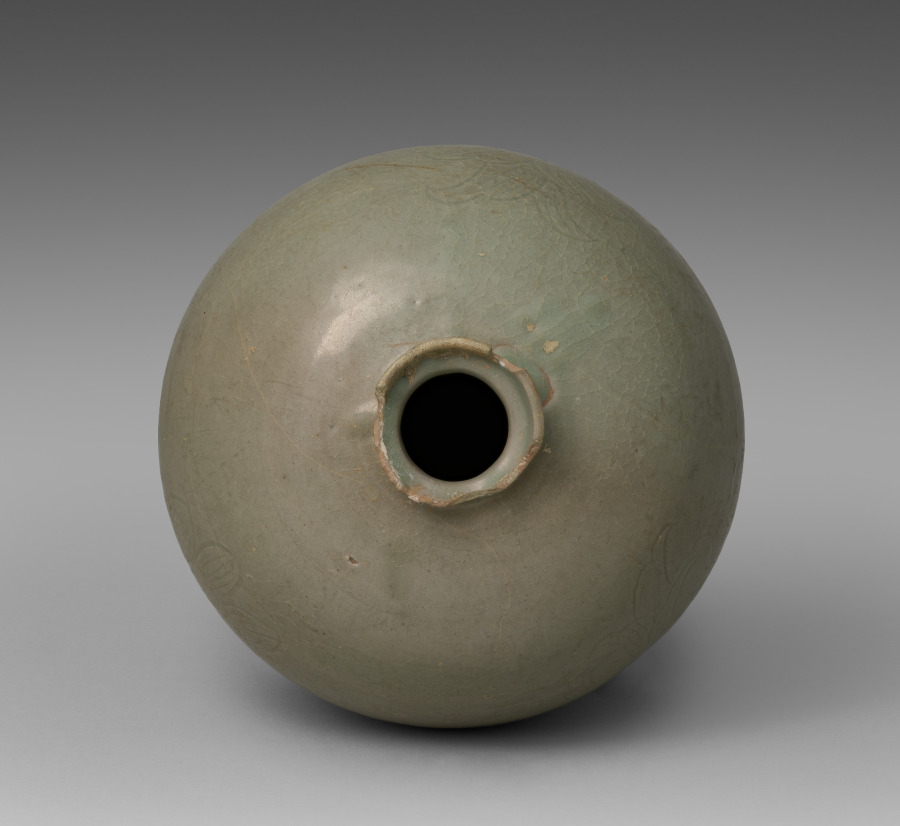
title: Prunus Vase with Incised Peony Design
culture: Korea, Goryeo dynasty (918–1392)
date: 1100s-1200s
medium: celadon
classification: Ceramic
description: As early as the seventh century, the practice of drinking tea and wine became an important part of elite culture in Korea. Once used to store alcoholic beverages, this type of vase features a wide body followed by a sharply rounded shoulder, a short neck and a small opening. Most of the remaining examples no longer have a lid, but originally it may have had a lid that not only covered the opening, but also served as a cup.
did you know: Prunus vases are often believed to contain a branch of plum blossoms, but recent researches reveal that these vases with a lid also were used to contain cooking liquid such as sesame oil.